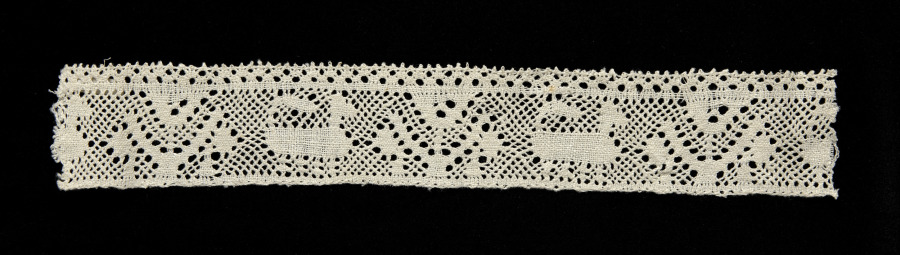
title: Lace Insertion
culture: Italy, Abruzzi, Pescocostanzo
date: 1600s–1700s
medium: Bobbin lace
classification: Lace